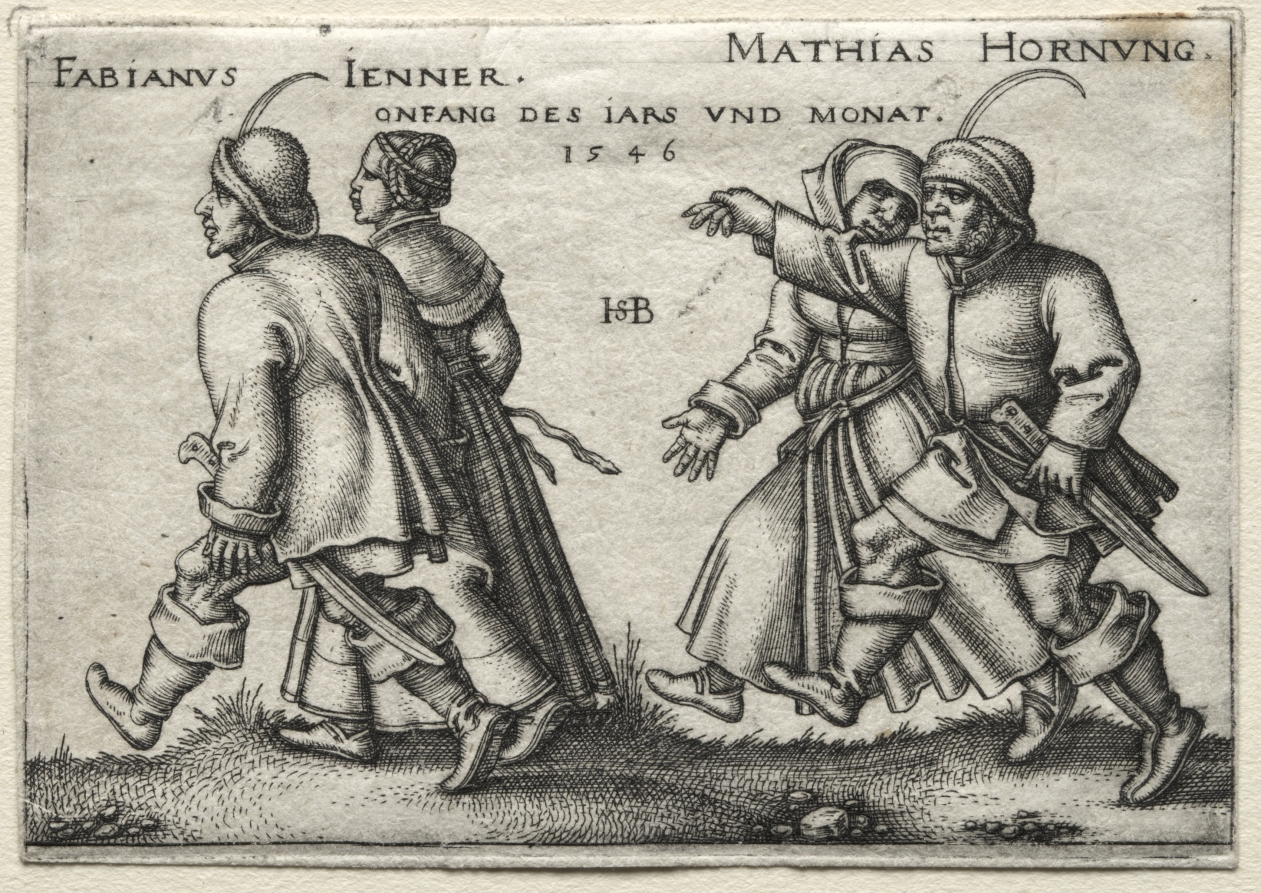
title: The Village Wedding: Fabianus Jenner / Mathias Hornung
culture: Germany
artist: Hans Sebald Beham (German, 1500–1550)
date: 1546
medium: engraving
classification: Print